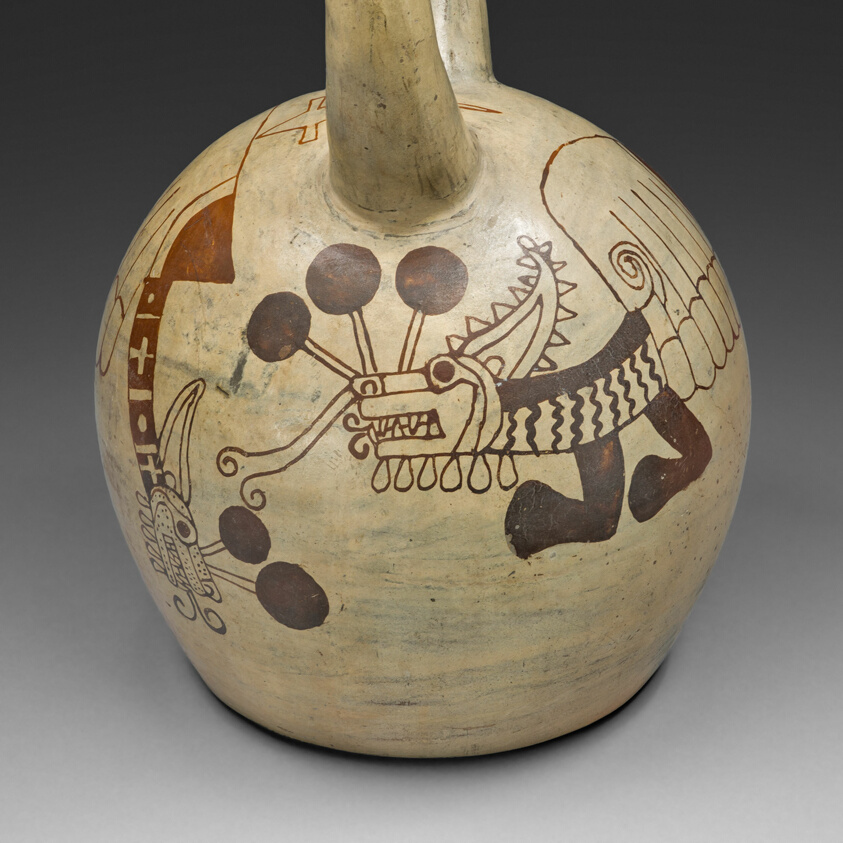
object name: Vessel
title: Stirrup Vessel Depicting a Supernatural Being within a Shell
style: moche, Arts of the Americas, andes, south american, andean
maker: Moche (North coast, Peru)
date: 100 BCE–500 CE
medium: Ceramic and pigment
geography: Peru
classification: earthenware; ceramics; vessel; art of the americas